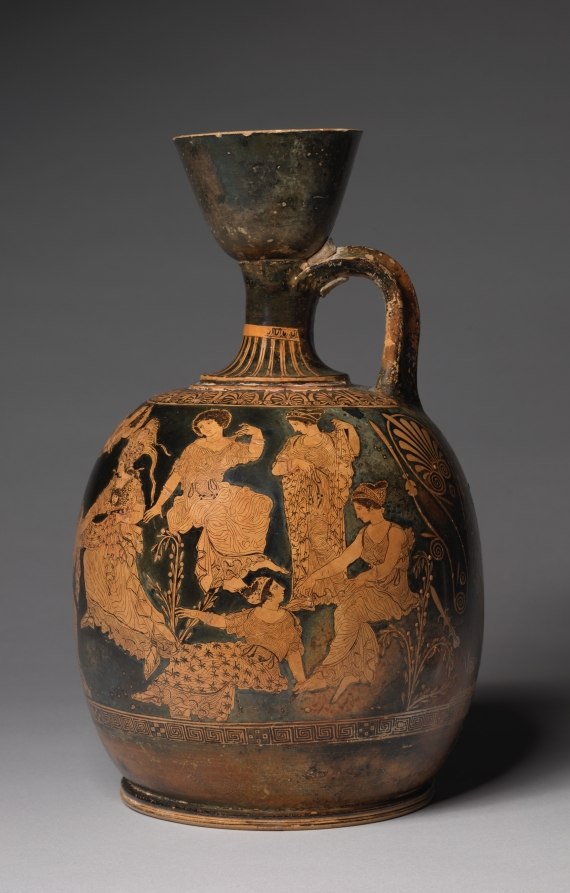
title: Red-Figure Squat Lekythos (Oil Vessel): Birth of Erichthonios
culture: Greek, Attic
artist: attributed to Meidias Painter (Greek, Attic, active c. 420–400 BCE)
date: c. 420–410 BCE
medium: ceramic, with gilding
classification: Ceramic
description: The central group on this vase shows the seated earth goddess Ge (also known as Gaia) handing her baby, Erichthonios, to Athena. Conceived from the seed of Hephaistos, Erichthonios would go on to become a king of Athens, and the story of his birth became popular in Athenian art of the fifth century BC. Other representations include Hephaistos as well as Kekrops, the mythical first king of Athens, sometimes together with Zeus and other deities. But this one includes only female onlookers—likely the three daughters of Kekrops watching from above, with Aphrodite and several abstract personifications such as Peitho (Persuasion) and Eudaimonia (Happiness) standing and seated nearby.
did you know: A lead rivet sits at the junction of handle and neck, probably an ancient repair.